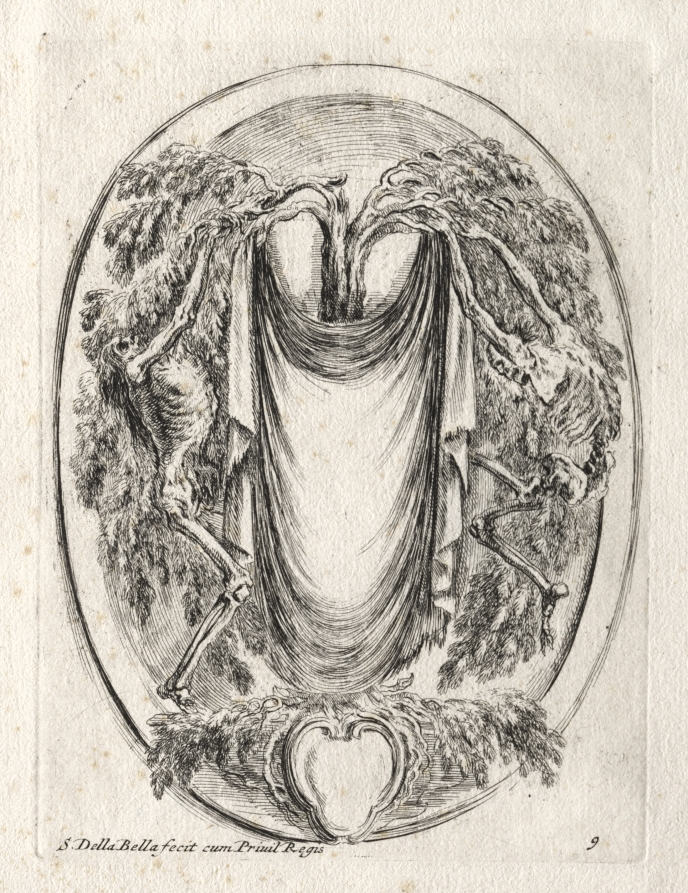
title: New Model for a Cartouche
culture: Italy, 17th century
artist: Stefano Della Bella (Italian, 1610–1664)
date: 1647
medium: etching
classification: Print